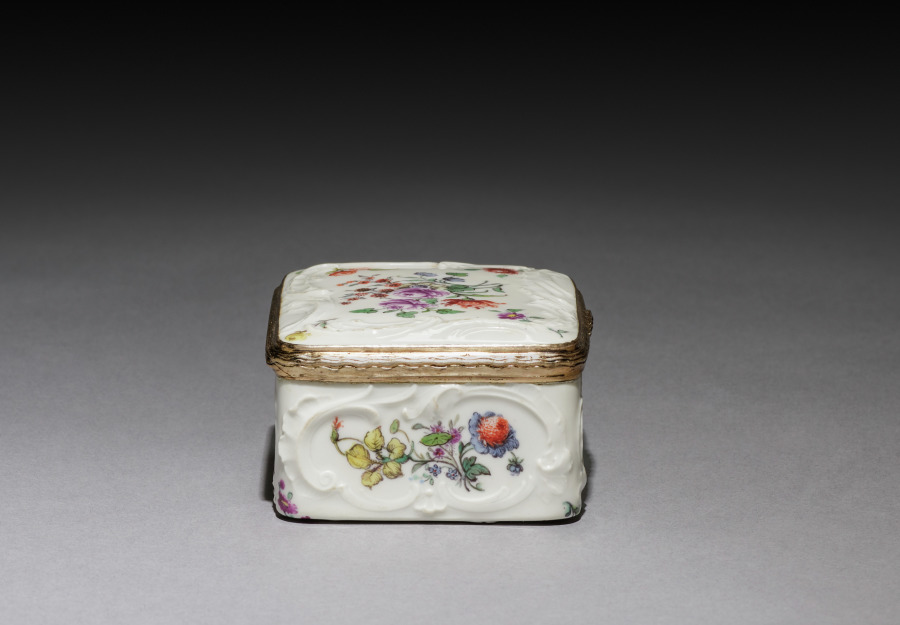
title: Box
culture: South Germany, 18th century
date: 1750–1775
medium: porcelain with silver-gilt mounts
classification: Miscellaneous